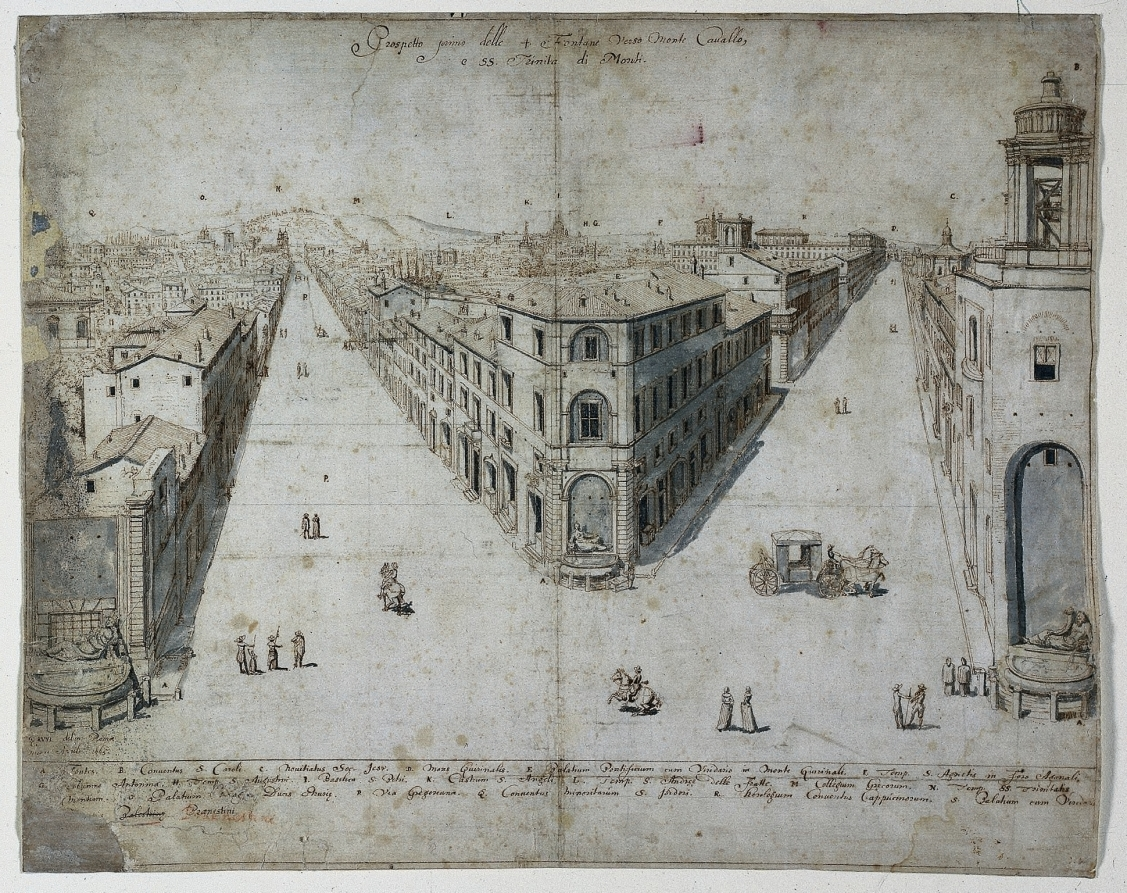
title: Eighteen Views of Rome: The Quattro Fontane Looking Toward Monte Cavallo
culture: Flanders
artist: Lievin Cruyl (Flemish, c. 1640-c. 1720)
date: 1665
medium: pen and brown ink and brush and gray wash over graphite; framing lines in brown ink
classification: Drawing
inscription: signed, lower left, in brown ink: [artist's monogram: LC] RVYL delin: Romæ / mense Aprili 1665. ; by artist, upper center, in brown ink: Prospetto primo delle 4. Fontane Verso Monte Cavallo, / e SS. Trinita di Monti ; by artist, throughout composition, in brown ink: [the letters A-R] ; by artist, across bottom, in brown ink: A. Fontes. B. Conventus S. Caroli. C. Novitiatus Soc. Jesv. D. Mons Quirnalis. E. Palatium Pontificium cum Viridario in Monte Quirinali. F. Temp. S. Agnetis in Foso Agonali. / G. Columna Antonina. H. Temp. S. Augustini. I. Basilica S. Petri. K. Castrum. S. Angeli. L. Temp. S. Andreæ delle Fratte. M. Collegium Grecorum. N. Temp. SS. Trinitatis / Montium. O. Palatium Mag[ni] Ducis Etruriæ. P. Via Gregoriana. Q. Conventus Minoritariúm S. Isidori. R. Horologium Conventus Cappúcinorum. S. Palatium cum Virida[r]io / [portion missing] Palestrinæ[crossed out] Praenestini [in red chalk] Prænestini. [in brown ink, rewitten over inscription in red chalk] ; ON STRIPS OF PAPER MOUNTED TO VERSO, bottom center, in graphite: A20983 ; lower right, in graphite: E. 20 ; ON PIECE OF PAPER APPLIED TO VERSO AS A REPAIR, lower right, in graphite: [four lines of illegible inscription] [upside down]